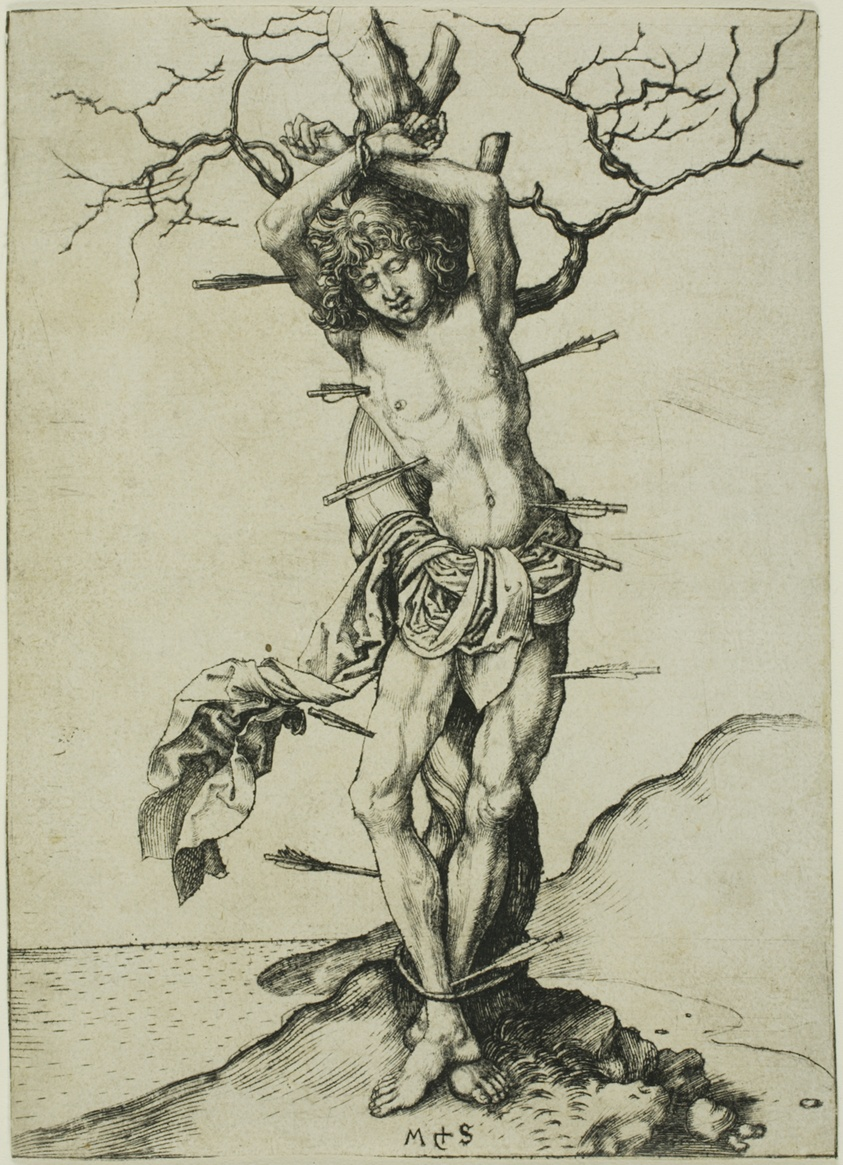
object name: Print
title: St. Sebastian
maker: Martin Schongauer (German, c. 1430/50-1491)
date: 1469/74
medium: Engraving on paper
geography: Germany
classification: engraving; print; prints and drawing